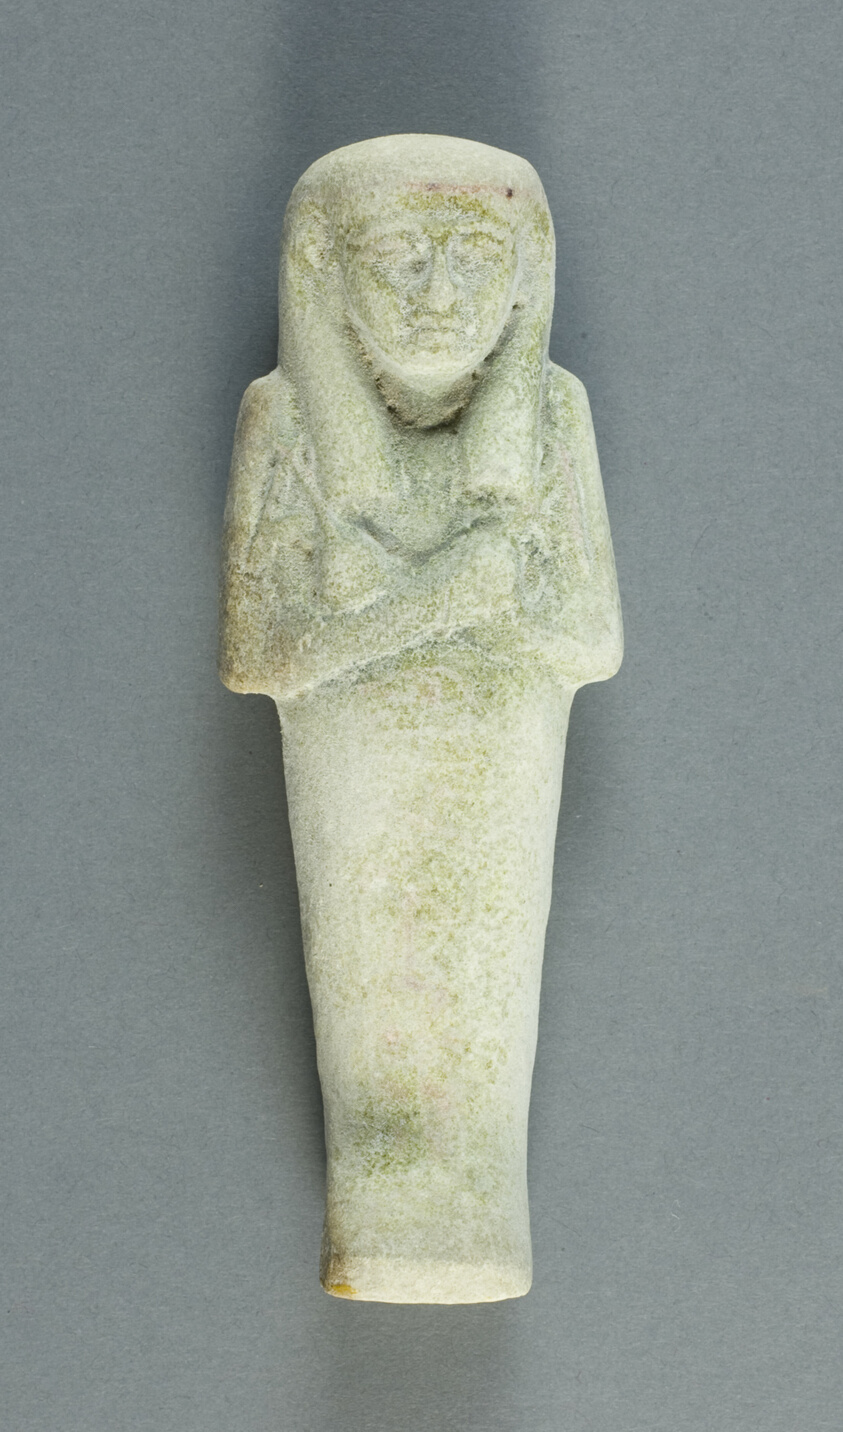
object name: Funerary Object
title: Shabti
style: egyptian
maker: Egyptian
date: Third Intermediate Period, Dynasties 21–22 (about 1069–715 BCE)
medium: Faience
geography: Egypt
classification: ushabti; ceramics; funerary; figurine; ancient art; faïence (composite material)